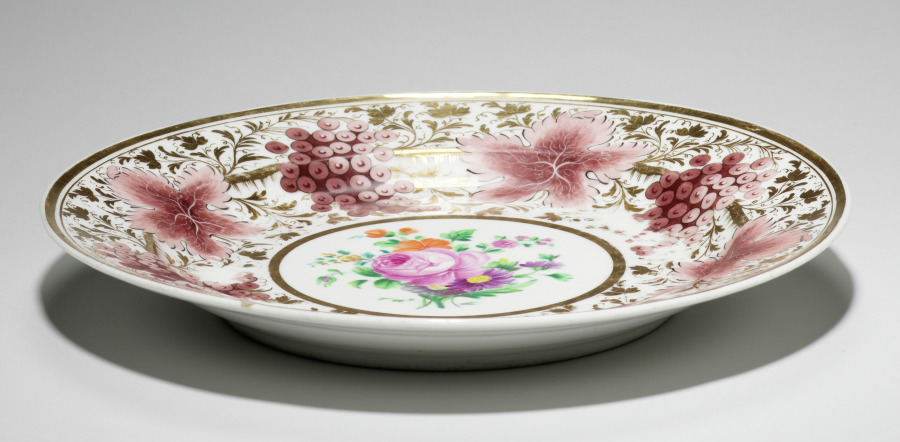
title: Plate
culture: Russia, St. Petersburg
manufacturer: St. Petersburg Imperial Porcelain Factory (Russian)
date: 1825–1855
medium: porcelain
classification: Ceramic